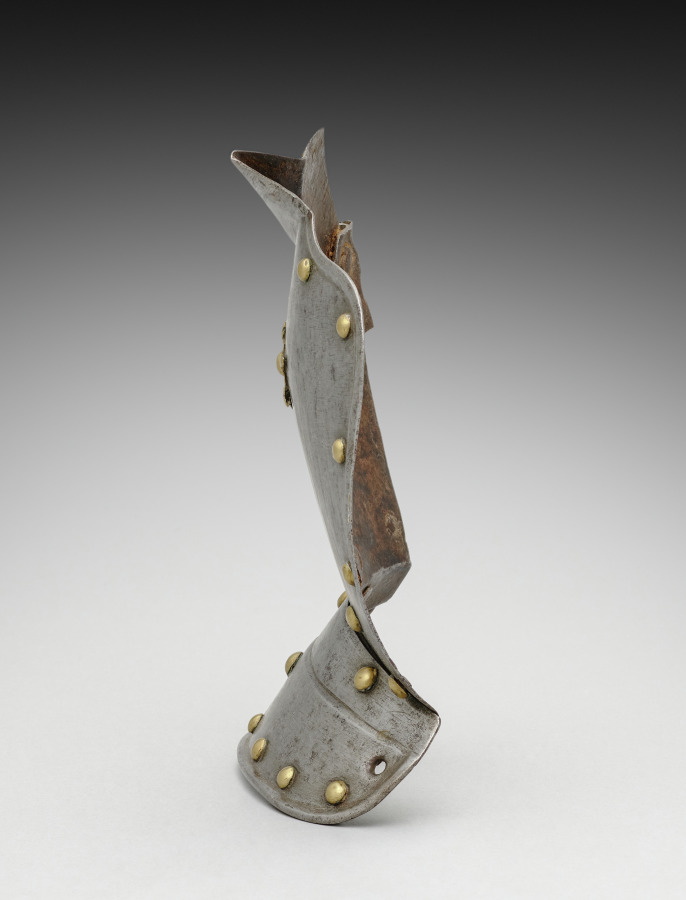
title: Ear Piece of a Helmet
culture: Germany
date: 1500s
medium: steel, brass headed rivets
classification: Arms and Armor